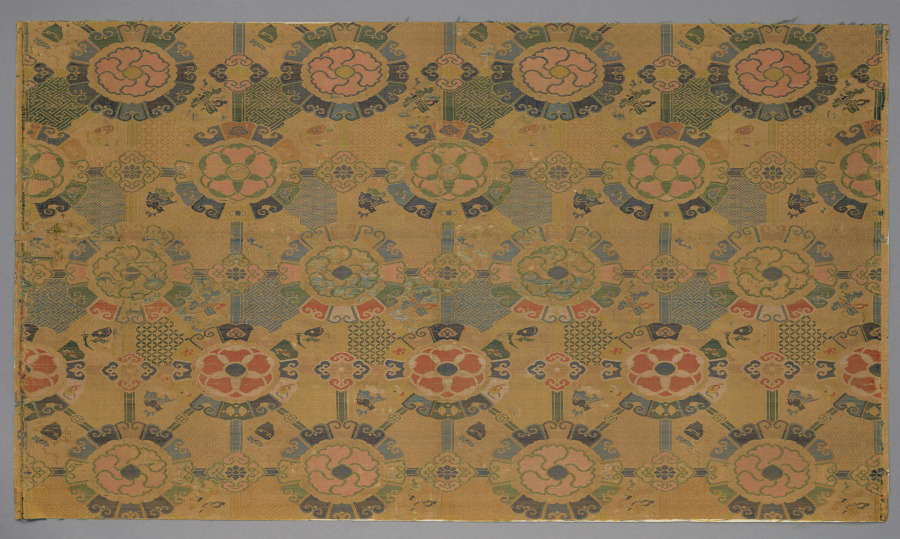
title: Fragment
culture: China, Ming dynasty (1368–1644)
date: 1368–1644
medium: Silk; compound twill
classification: Textile